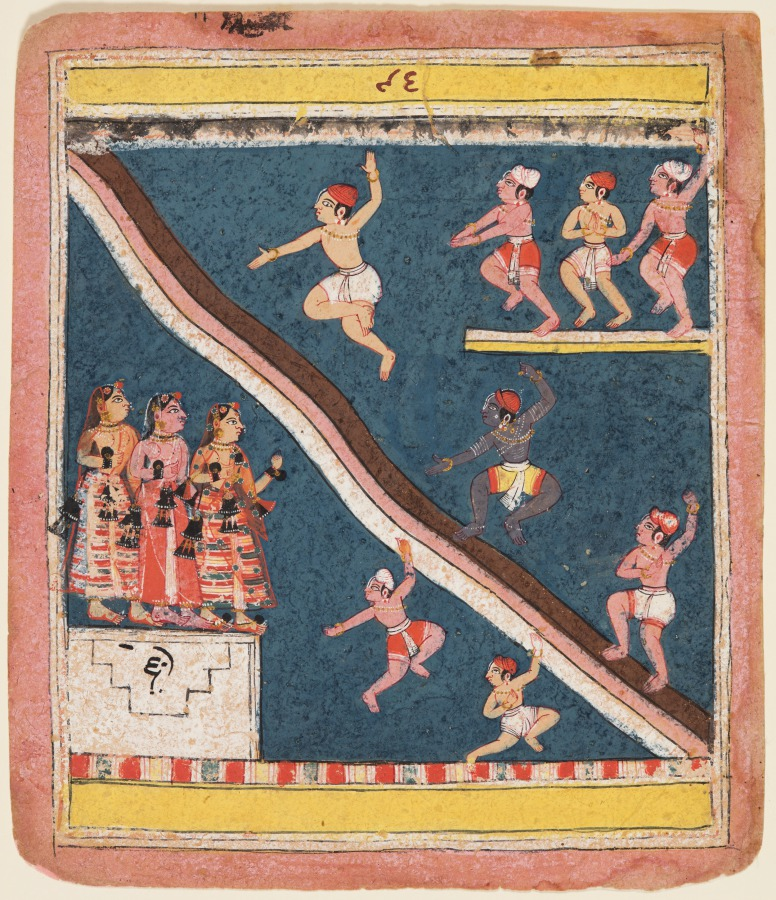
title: Krishna and the Cowherds Dive into the River, from a Rasikapriya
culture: Central India, Madhya Pradesh, Malwa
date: c. 1640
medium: gum tempera, ink, and gold on paper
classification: Painting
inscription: atha nyaute kau milnu.2. nyauti kai bulaī hutī betī vṛṣabhānajū kī, jeṃvai kau jasodā rānī ānī hai siṃgārikai. bhojanu kai ūpara bhavana gāi pāna khāti dekhive kau ke sauda sa ānadu vicārikai. dekhata dekhata hari bhavate koṃ bhāgi dekhi. dauri gahī vyalu aisī veṃnī daru daru darikai. bheṃti bhari anka mana bhāyau kari chaṃdi muhu kesari sam mādi laī besari utārike. 1000000000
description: Krishna and seven cowherds (gopas) playfully jump into a river, depicted as a wavy tricolor band that divides the composition diagonally in half. Krishna and four others are already airborne, while three get ready to jump. Radha and her friends witness this feat in amusement from a marble platform. The milkmaids are fully dressed, while Krishna and the cowherds are wearing kaupina loincloths.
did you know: The boys are shown in subtly different sizes to convey their movement through space.